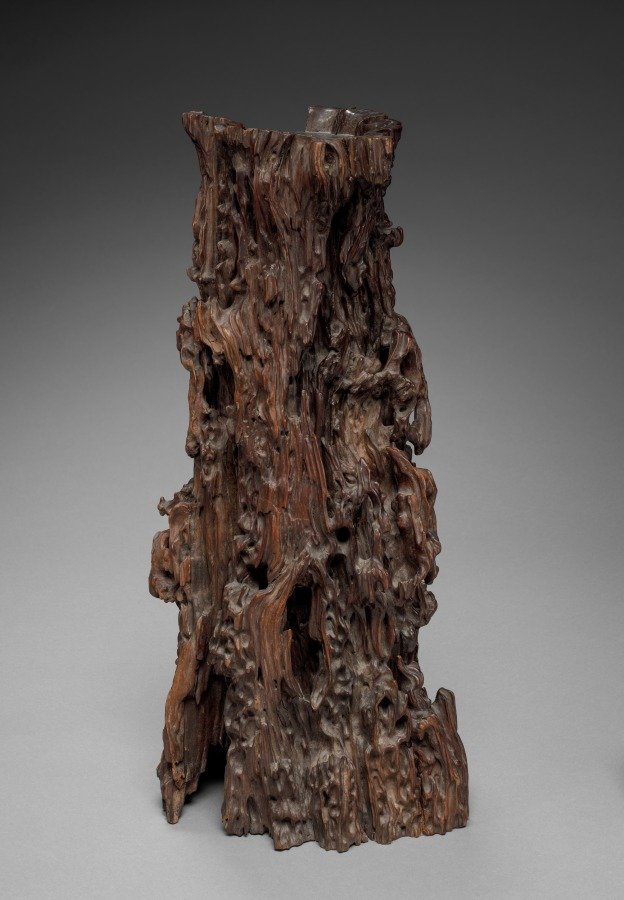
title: Prunus Wood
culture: China, Qing dynasty (1644-1911)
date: 1700–1899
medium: wood carving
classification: Wood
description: The gnarled and twisted form of a prunus stump is carved to accentuate its naturally textured surface. The body is finely polished to create a lustrous patina. Simple wood carvings like this exemplify the Chinese scholars’ taste for natural forms and rustic materials, which in turn reflect the desire to retreat into nature. They were collected and displayed as decorative works of art in the traditional scholars’ studios.